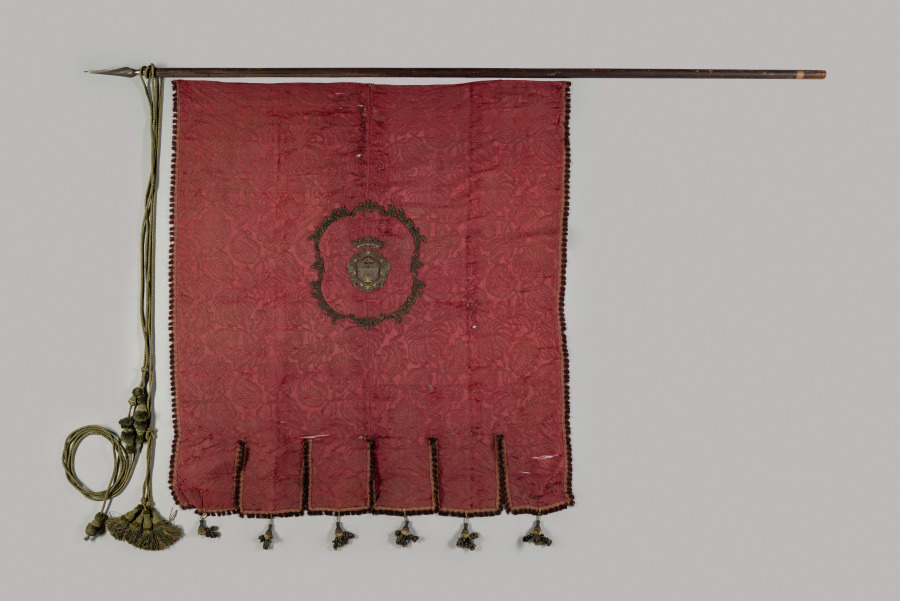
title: Banner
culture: Spain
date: 1700s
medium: crimson silk brocade, with applied embroidery; scalloped border with fringe and tassels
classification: Textile